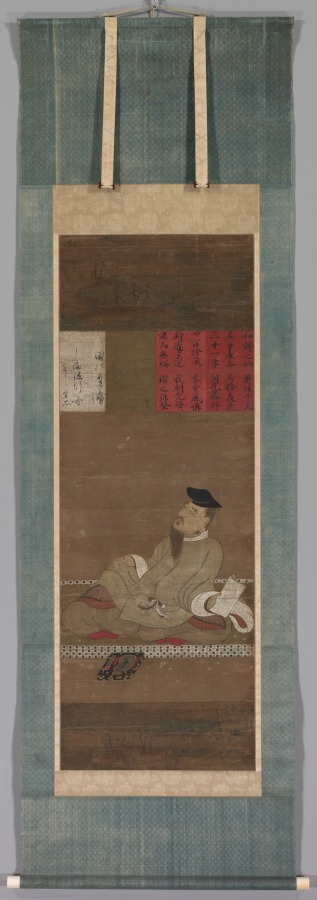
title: Kakinomoto no Hitomaro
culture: Japan, Kamakura period (1185–1333)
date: early 1300s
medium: hanging scroll; ink and color on silk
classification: Painting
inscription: 浦のあさ霧にしま隠れゆく舟をしぞ思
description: Among Japan’s greatest poets, Kakinomoto no Hitomaro’s (c. 660–724) portrait was often displayed at poetry competitions. Here, he gazes up at a falling cherry blossom, his writing box before him, brush and paper in his hands. A short biography and one of his poems are inked on painted rectangles meant to look like decorated papers. The first part of the poem has been mostly lost, but from what remains, it is possible to recognize it as Dimly, dimly in the morning mist that lies over Akashi Bay, my longings follow with the ship that vanishes behind the distant isle. —Translated by Robert H. Bower and Earl Roy Miner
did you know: The landscapes at the top and bottom of the painting depict Akashi Bay, with its famous pines along the shore, and a lone figure in a boat.